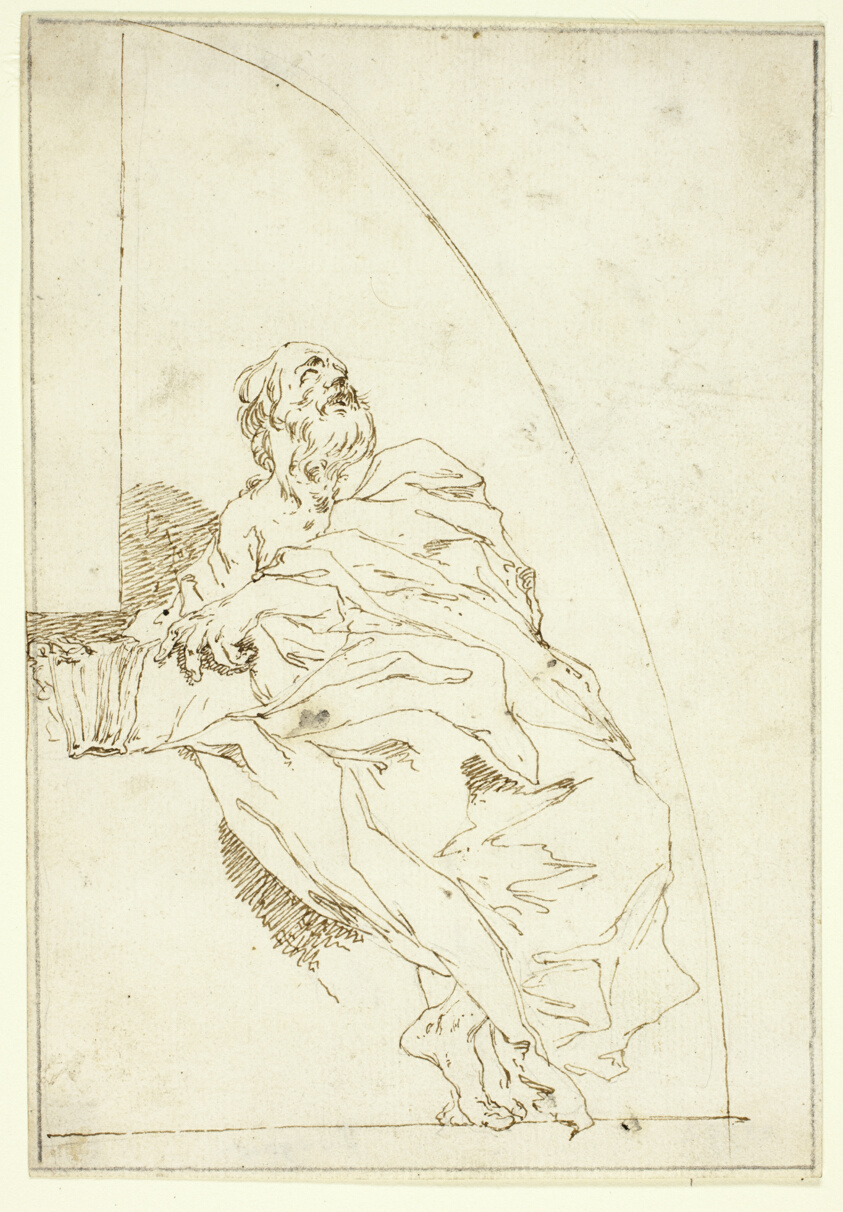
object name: Drawing and Watercolor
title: Prophet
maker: Paul Troger (Austrian, 1698-1762)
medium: Pen and brown ink on ivory laid paper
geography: Austria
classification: pen and ink drawings; drawings (visual works); prints and drawing